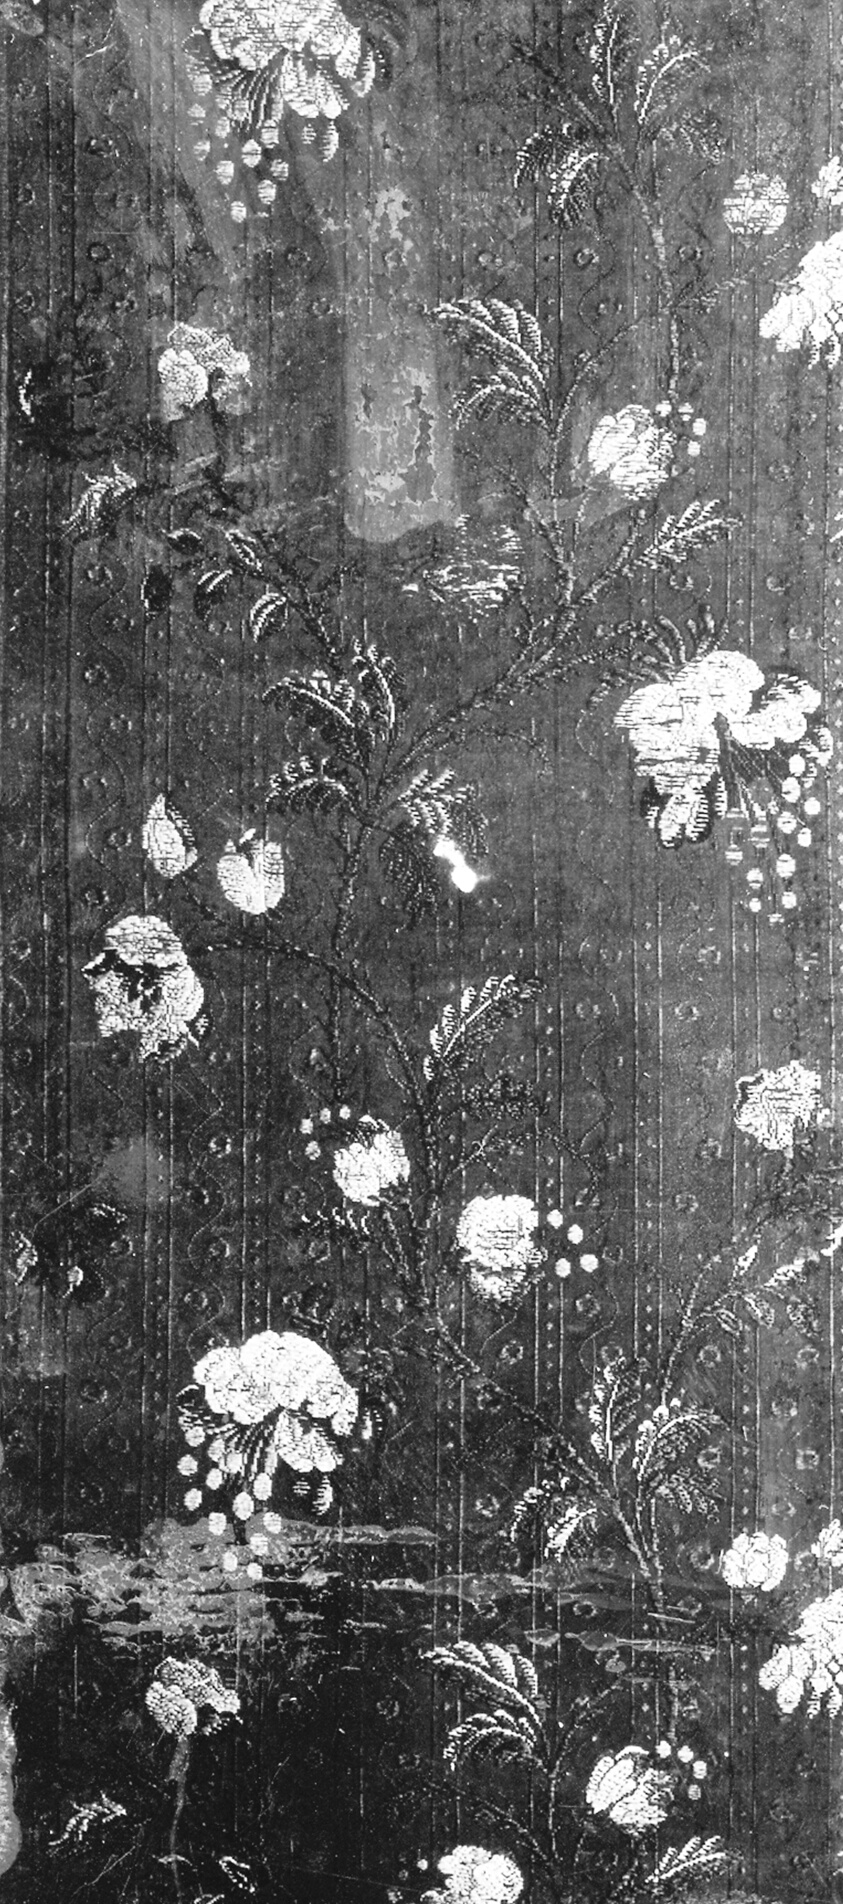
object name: Textile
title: Panel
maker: France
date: Mid–18th century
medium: brocaded silk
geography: France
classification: textile; weaving